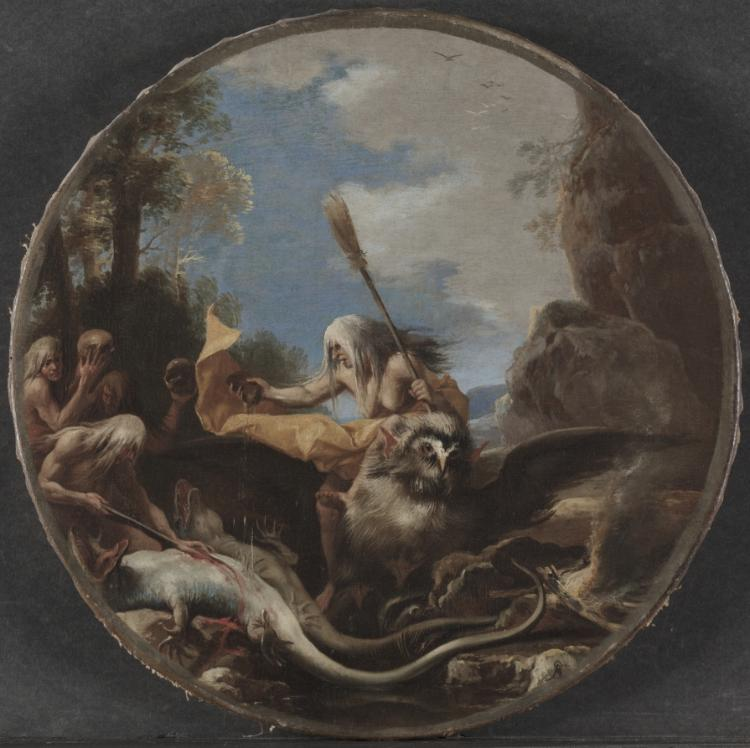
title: Scenes of Witchcraft: Day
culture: Italy, 17th century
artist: Salvator Rosa (Italian, 1615–1673)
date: c. 1645–1649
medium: oil on canvas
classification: Painting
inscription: Signed: "SR [monogram]"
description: Rosa's scene at noon showcases several hoary hags that exemplify his treatment of witches. Clutching skulls, wielding brooms, and slicing lizards, the witches prepare to travel to the Sabbath, an orgy of witches. One witch flays the skin of a thrashing lizard to extract the innards needed to concoct magical unguents, while her companions brandish skulls. Goats were the common mode of transportation for witches, but Rosa substitutes an owl, a harbinger of evil. Although Rosa foregrounds the violent cruelty of witchcraft, situating the grotesque hags in the full light of day introduces a comic aspect to the scene. Rosa's use of comedy and the unexpected to critique the world around him stemmed from the satirical poetry he wrote throughout his stay in Florence and his return to Rome in 1649. By lightening the palette and mood of the painting, Day reflects his interest in satire and his self-appointed role to expose and critique human folly.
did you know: The artist chose the painting's shape to reference the foundational role of the circle in practicing magic.